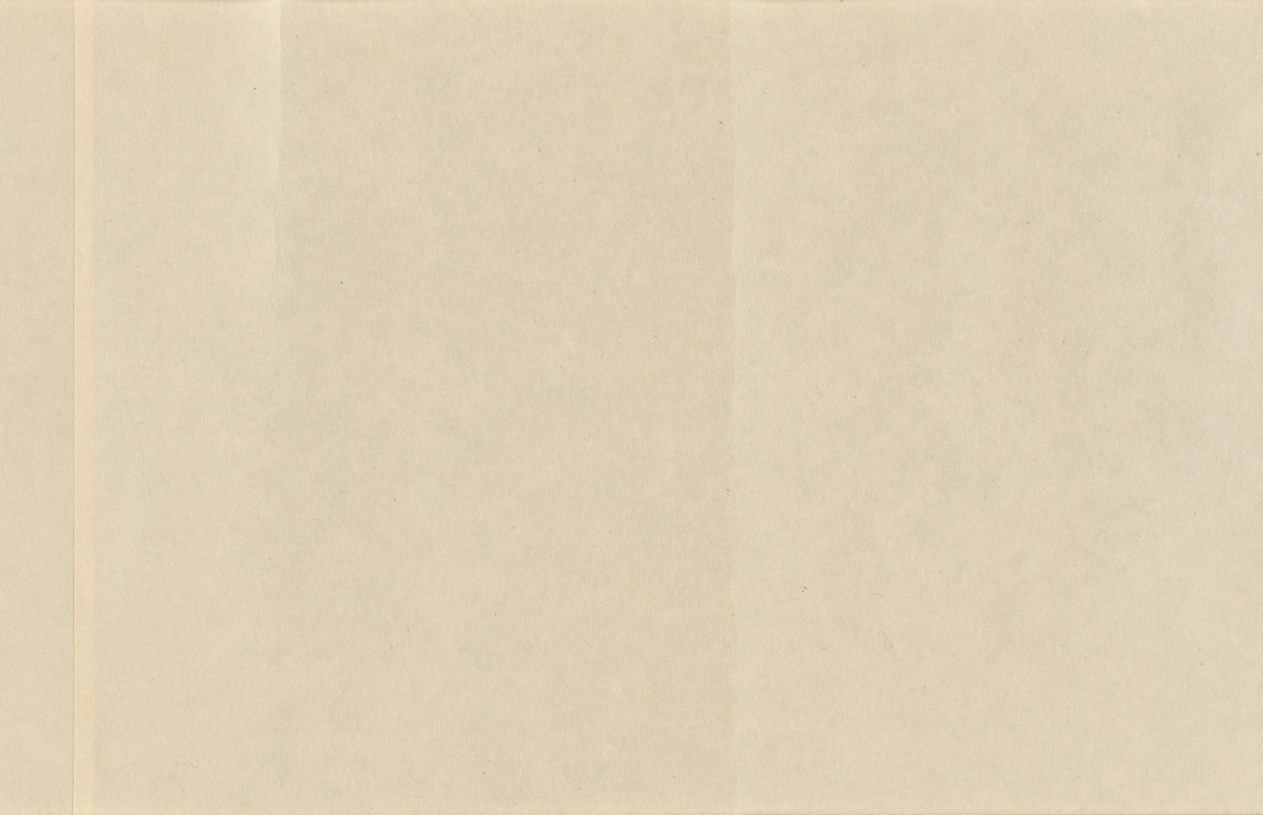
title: Eight Views of Xiao-Xiang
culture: Japan, Muromachi period (1392–1573)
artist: Sesson Shūkei (Japanese, c. 1492–c. 1577)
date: 1500s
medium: handscroll; ink on paper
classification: Painting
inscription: Signature and seal of artist at end of painting.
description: Eight Views of the Xiao and Xiang Rivers can be traced to 11th-century Chinese poems and paintings, the depiction of which had also become popular among Korean and Japanese painters. Xiao-Xiang refers to the region in present-day Hunan province where the Xiao and Xiang rivers converge. Few painters of the Eight Views had in fact seen the scenery; rather, they were trying to portray in ink and wash the lyrical qualities of dim light and a misty atmosphere typical of that region. Each of the poetic titles suggests a time of day, a season, or specific atmospheric conditions—subjects that challenged the abilities of the most talented artists. In this miniature painting (shukuzu) of the Muromachi period, Japanese Zen monk and painter Shukei Sesson depicted all eight views featured in Chinese prototypes: Wild Geese Descending to Sandbar; Returning Sails Off a Distant Coast; Mountain Market in Clearing Mist; River and Sky in Evening Snow; Autumn Moon over Dongting Lake; Night Rain on the Xiao and Xiang; Evening Bell from Mist-Shrouded Temple; and Fishing Village in Evening Glow.